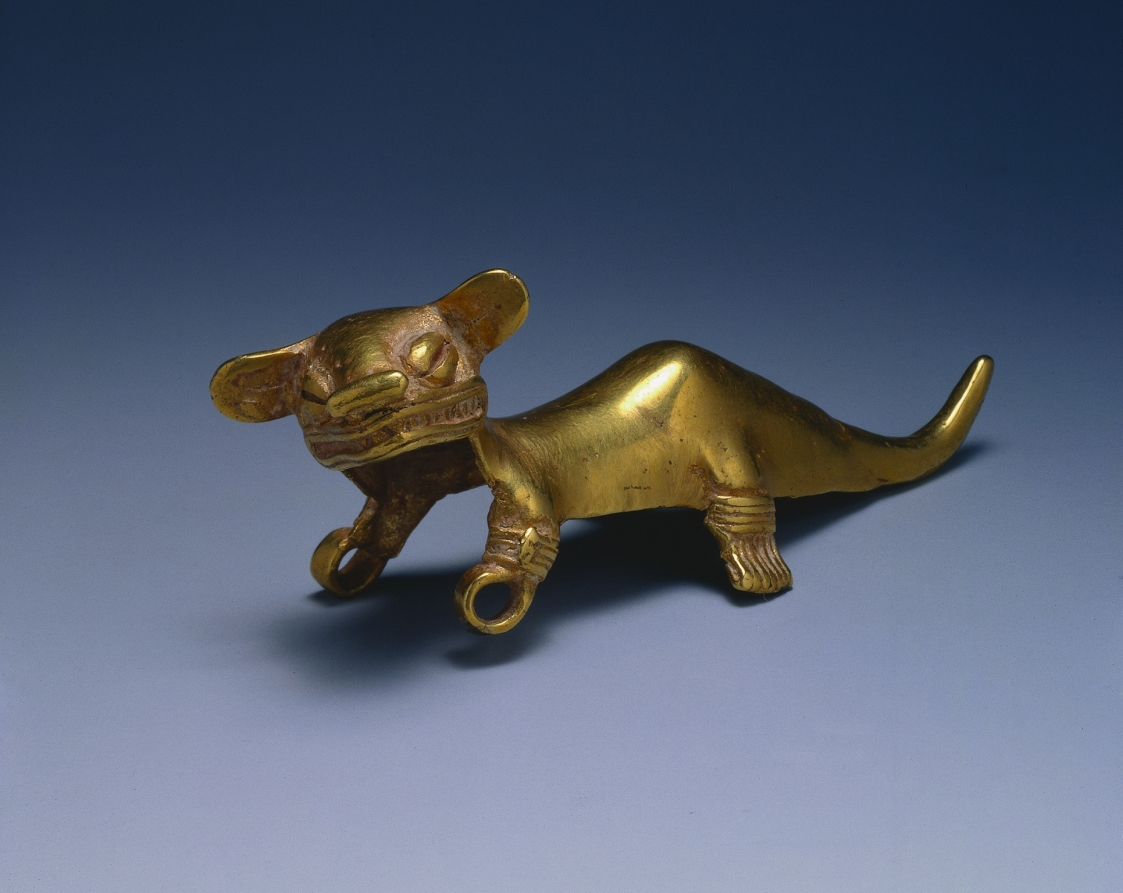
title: Feline Pendant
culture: Western Panama, Veraguas-Gran Chiriquí Style, 10th-16th century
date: c. 1000–1550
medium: cast gold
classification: Metalwork